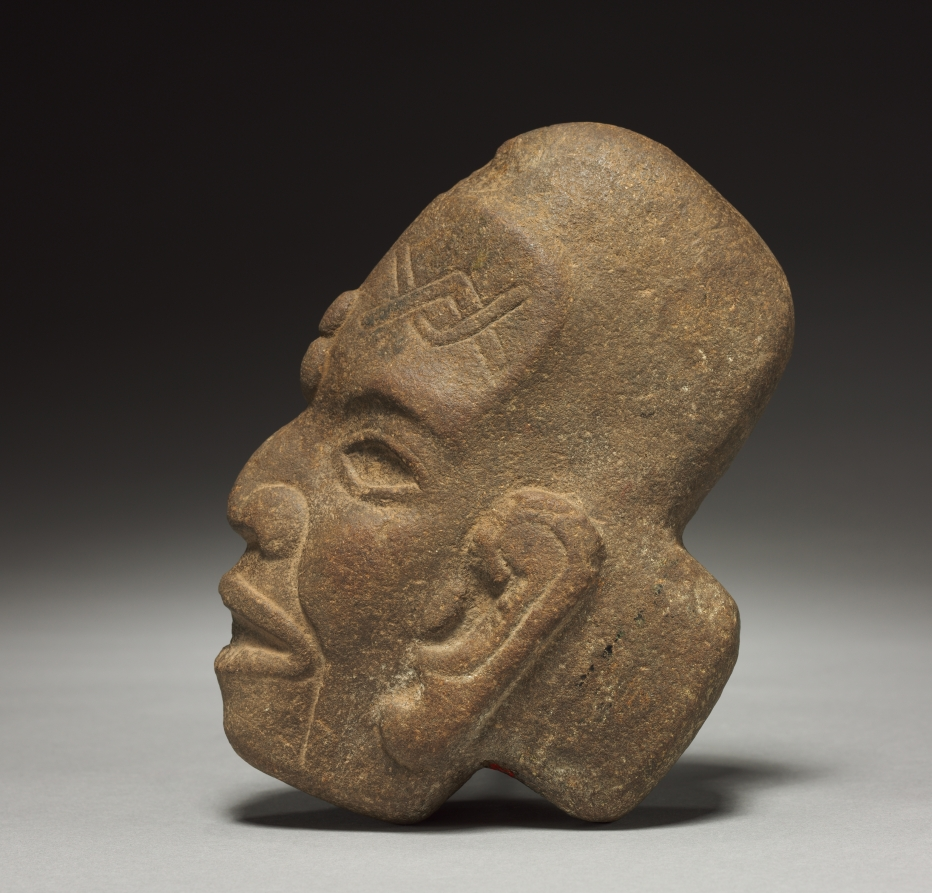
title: Ballgame Thin Stone Head (Hacha)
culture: Mesoamerica, Classic Veracruz style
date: 600–900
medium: stone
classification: Sculpture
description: This enigmatic head is associated with an ancient ballgame played both for sport and ceremonial purposes on Mexico’s Gulf Coast, in present-day Veracruz. It may represent an elite ballplayer or ballgame patron—the forehead is incised with interlaced designs similar to the so-called mat motif, a Maya symbol for rulership. Such heads are known as hachas (Spanish for “axe”) because they often taper to a thin edge at the front, giving them the appearance of axe heads.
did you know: The interlaced designs on this head’s forehead are similar to a Maya symbol for rulership.